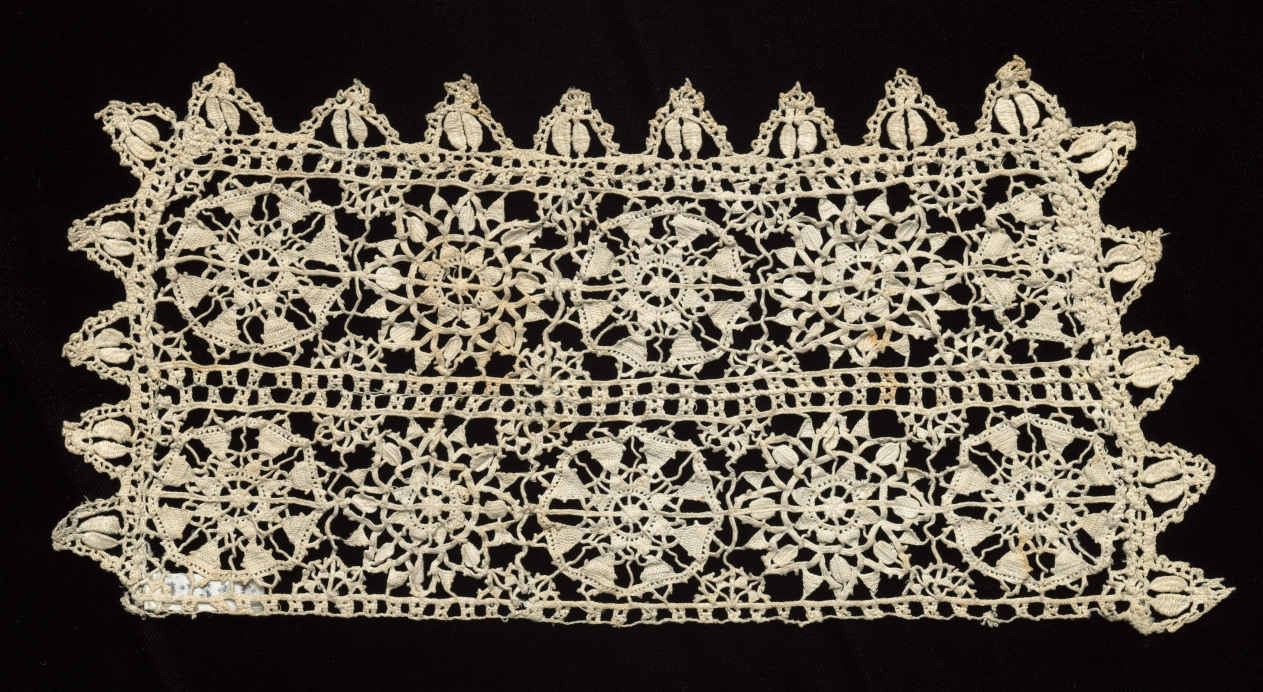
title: Lace Cuff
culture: Italy, Genoa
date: 1560–1600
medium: Linen; needle lace (cutwork and reticella) and bobbin lace edging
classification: Lace